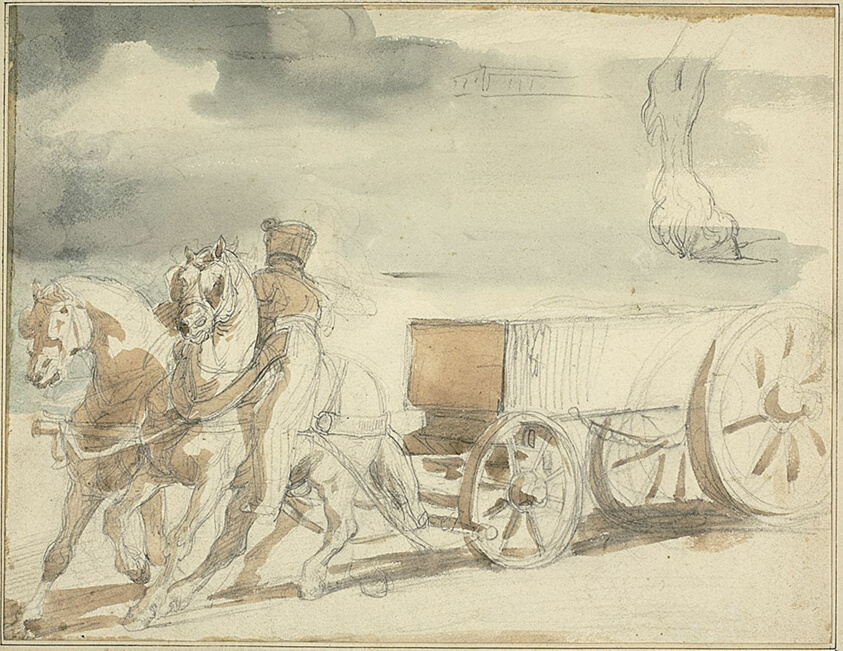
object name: Drawing and Watercolor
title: Munitions Cart Drawn by Two Horses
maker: Jean Louis André Théodore Géricault (French, 1791-1824)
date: 1818/1819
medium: Graphite and brush and brown and blue wash, on cream wove paper, perimeter mounted on cream wove paper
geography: France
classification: drawings (visual works); prints and drawing